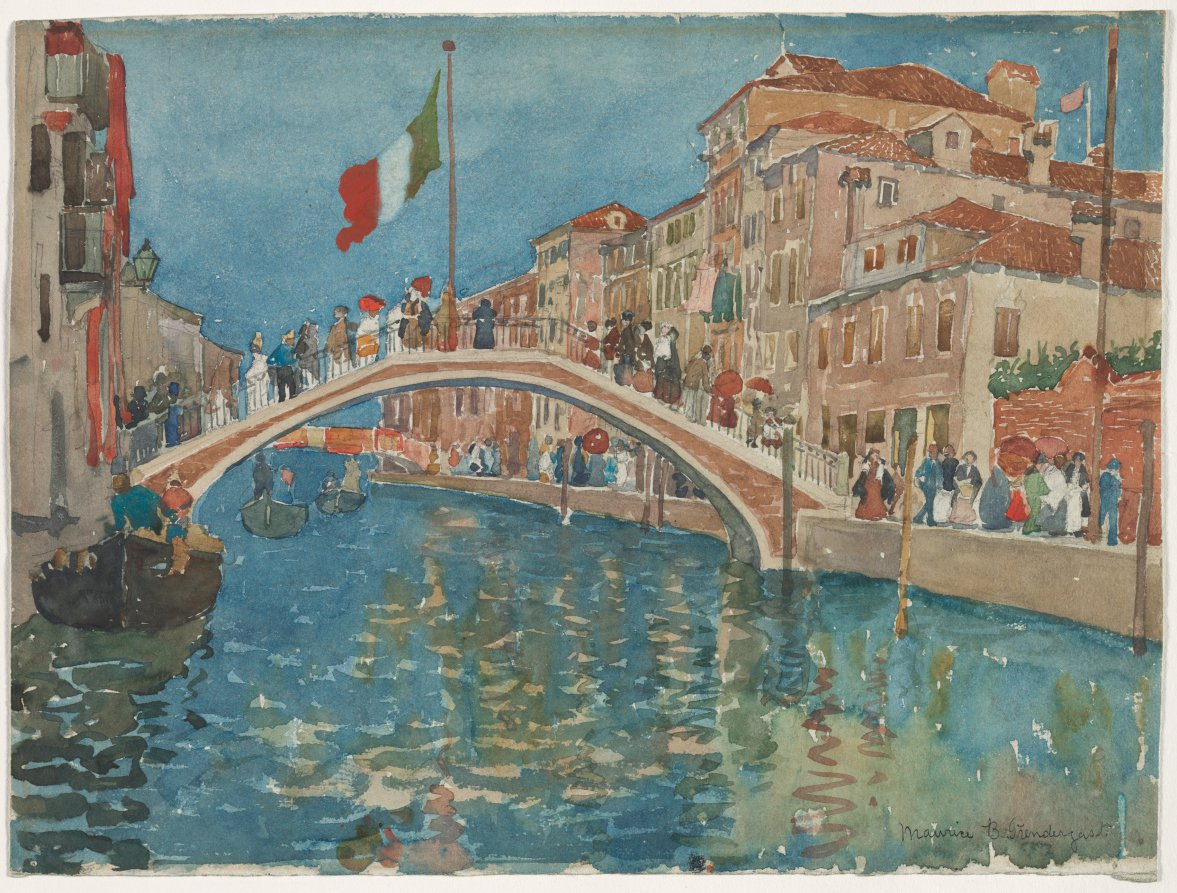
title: A Bridge in Venice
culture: America, late 19th Century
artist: Maurice Prendergast (American, born Newfoundland [now Canada], 1858–1924)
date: 1899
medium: watercolor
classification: Drawing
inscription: Signed lower right corner: Maurice B. Prendergast